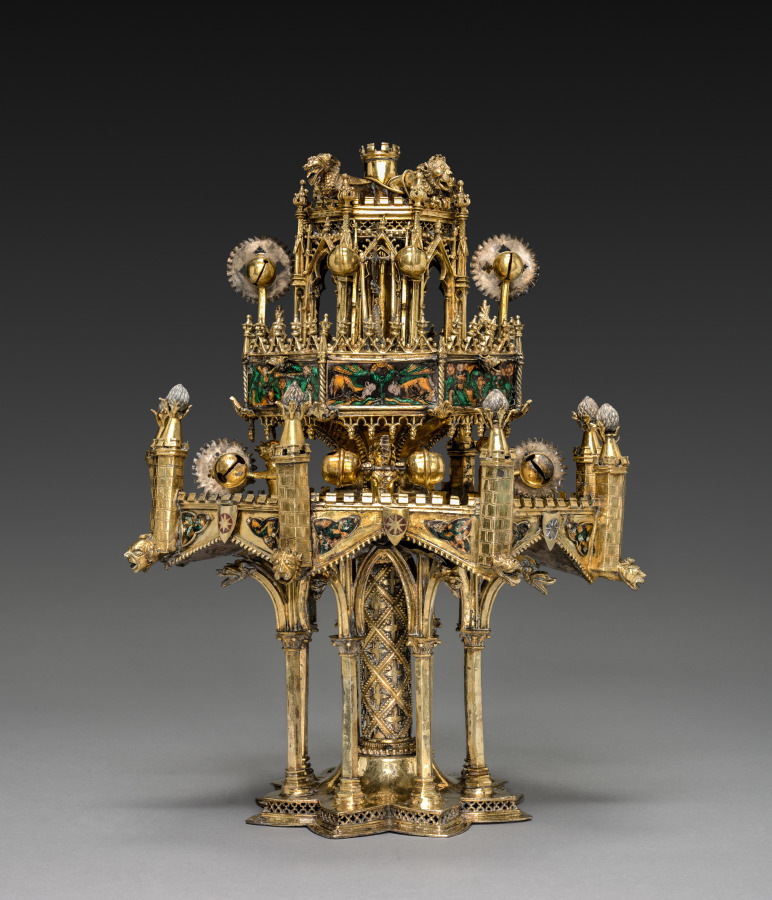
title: Table Fountain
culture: France, Paris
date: c. 1320–40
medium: gilt-silver and translucent enamels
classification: Metalwork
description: Conceptually and stylistically, this object is beyond all else a piece of Gothic architecture in miniature with vaults, pinnacles, columns, and traceried arches. Though the artist who created it is unknown, he was unquestionably inspired by the great Gothic buildings of his time. The table fountain is a three-tiered assembly combining cast elements with bent sheets of gilt-silver. To these have been attached a series of enamel plaques representing grotesque figures, some of which play musical instruments. Water wheels and bells were added to capture motion and sound. The rich detail, precious materials, and involved ornamentation of this deluxe object suggest it would have been expensive to produce and highly treasured by its original owner, someone of high status, and would have been deployed as an object of spectacle. This is the most complete example of its type known to survive from the Middle Ages. Medieval inventories reveal that small fountains like this, often taking various forms, and generally made from precious metals, once existed in large numbers, thus making the Cleveland table fountain an extremely rare object.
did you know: This fountain with its minute architectural details and finely made enamel plaques displayed the wealth and refinement of the owner as it entertained his guests. Imagine hearing the ringing of the tiny bells when this fountain was in use.